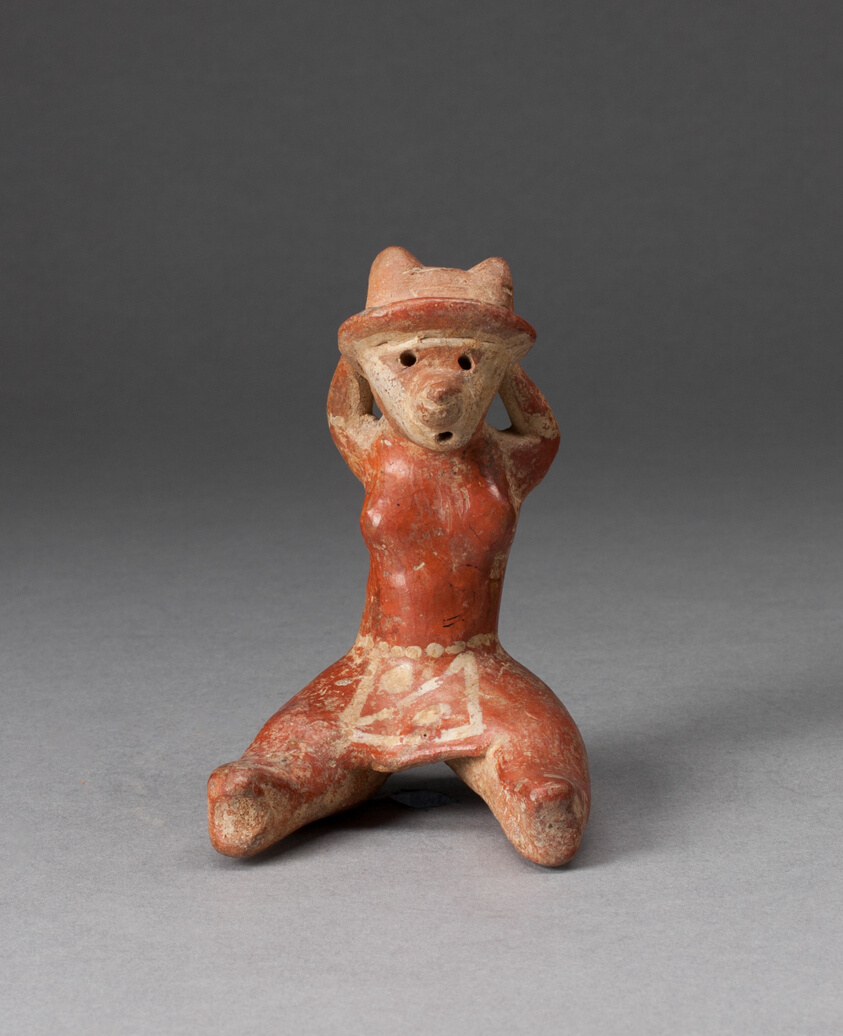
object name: Sculpture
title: Miniature Seated Figurine with Arms Held Behind the Head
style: nayarit, Arts of the Americas, mesoamerican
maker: Nayarit, Chinesco style; Nayarit, Mexico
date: 100 BCE–300 CE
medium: Ceramic and pigment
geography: Nayarit state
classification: earthenware; art of the americas; ceramics; sculpture